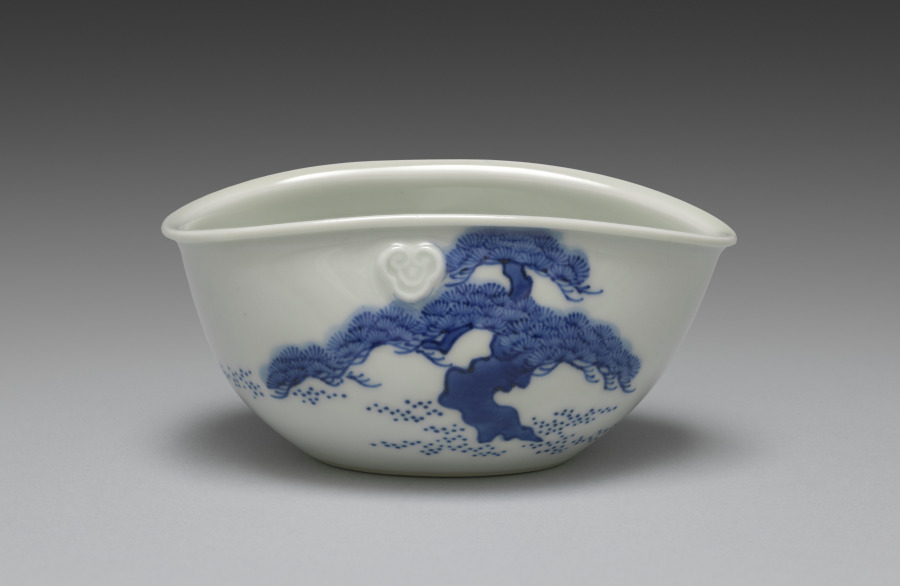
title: Water Cooler with Pines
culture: Japan, Meiji period (1868–1912)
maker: Seifū Yohei III (Japanese, 1851–1914)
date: 1893–1914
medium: Porcelain with underglaze blue and molded designs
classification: Ceramic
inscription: The center of the base contains an ovoid “Seifu” seal.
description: Hot water coolers, or yuzamashi, are essential components of sencha tea sets. Yuzamashi are used to cool boiled water to the ideal temperature for the type of tea to be brewed. The kidney-like shape of this one permits it to be cradled in one hand, following curvature of the palm, with the tips of the thumb and index finger each pressed against a nyoi staff-head-shaped applied form, perfectly placed to ensure a stable hold. Someone pinching the cooler in this way would have enough protection from the heat to maintain a steady grip but also sufficient contact along the base of thumb to assess the water temperature. On each of the cooler’s two longer sides, a pine tree in grass or sand is painted under the glaze in cobalt blue. The tree on one side has two main roots and two large branches, while that on the other has a single, thick, curved line from root to tip with racks of needles spreading across the width of the sky. A blue oval is traced along the footring, and the center of the base contains an ovoid “Seifu” seal.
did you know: Evergreen, pines have associations with eternal youth and longevity.